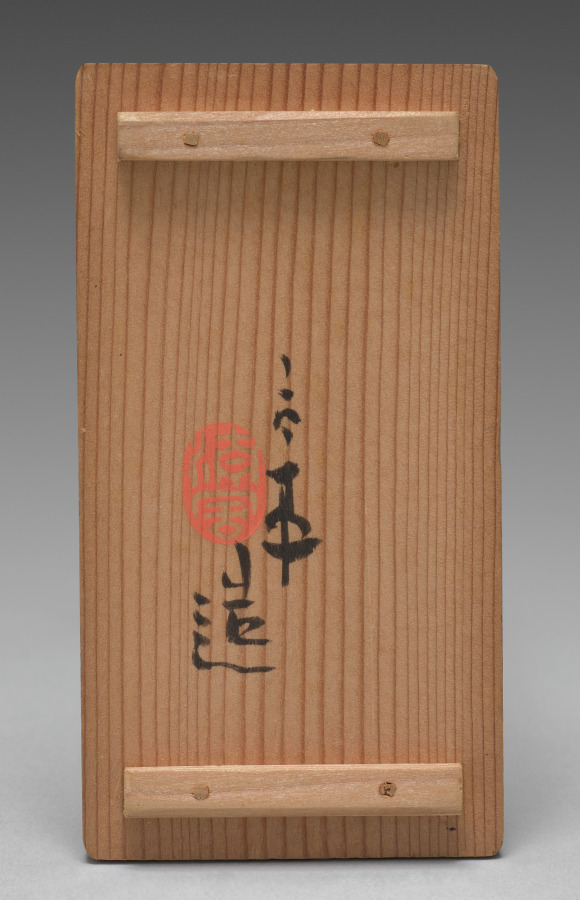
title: Roller Ends for Hanging Scroll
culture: Japan, Meiji period (1868–1912)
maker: Seifū Yohei III (Japanese, 1851–1914)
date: 1893–1914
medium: Pair of hanging scroll roller ends; porcelain with green glaze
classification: Ceramic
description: Before entering into his apprenticeship with Yohei II, Seifū Yohei III trained as a painter in Osaka. He continued to paint throughout his career as a ceramist. As part of his ceramic practice, Yohei III also made roller ends to be placed at either end of the wooden dowel around which the lower part of a hanging scroll mounting is wrapped. These served both as weights for the painting and as knobs for handling it when rolling and unrolling. The pair here is made of porcelain with a green glaze.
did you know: These are the roller ends for the hanging scroll by Seifū Yohei III, Rain Clearing over a Summer’s Mountain, CMA 2022.151.